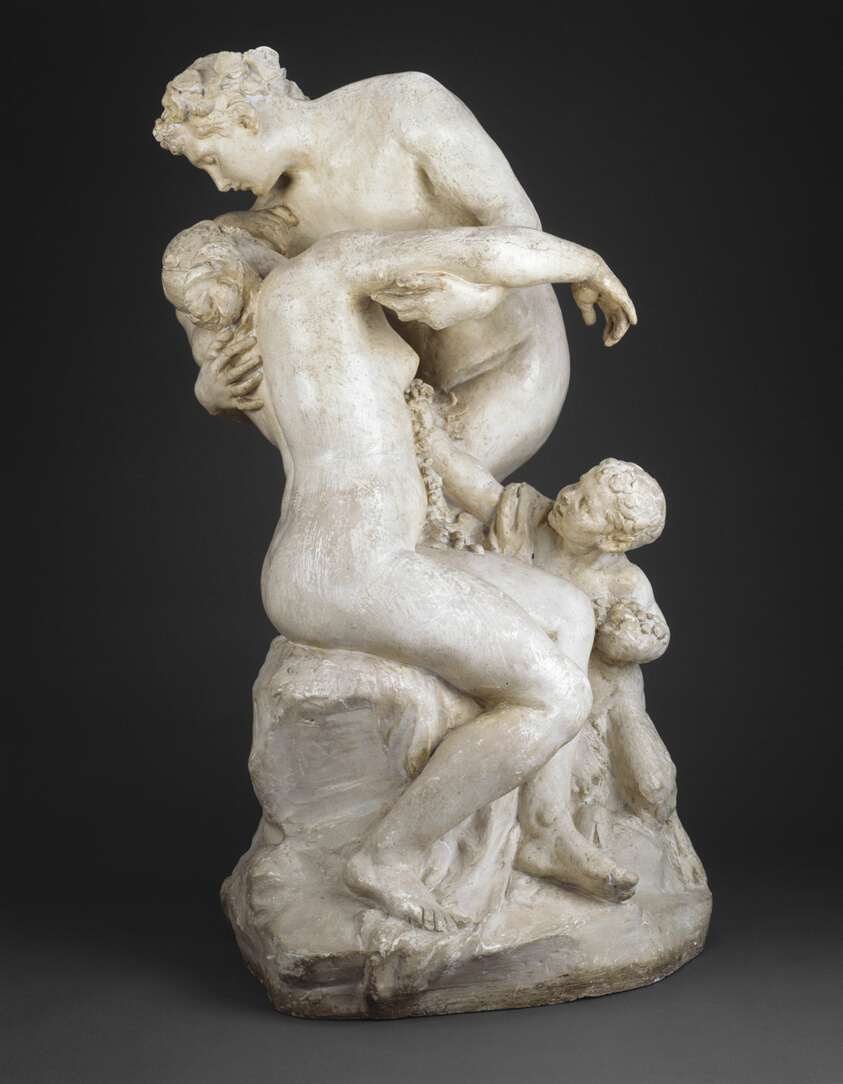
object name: Sculpture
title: Bacchus Consoling Ariadne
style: nineteenth century, 19th century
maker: Aimé-Jules Dalou (French, 1838–1902)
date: c. 1892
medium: Plaster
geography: France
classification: statuette; french; sculpture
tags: Greek mythology, nudes, mythology, mythological figures, mythical, love, Greek gods, fauns/satyrs/pan, children, women, men, emotions